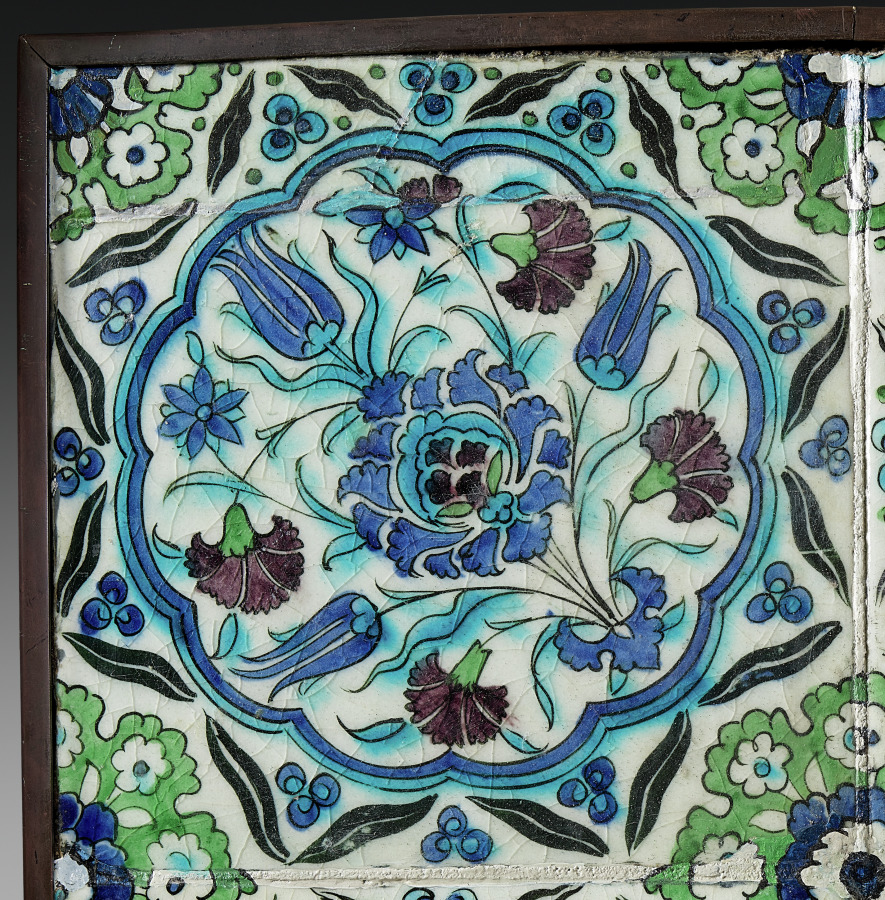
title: Wall Tile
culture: Turkey (Iznik), Ottoman Period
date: 1600s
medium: fritware with underglaze-painted design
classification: Ceramic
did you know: Iznik tiles are renowned for their brilliant colors.